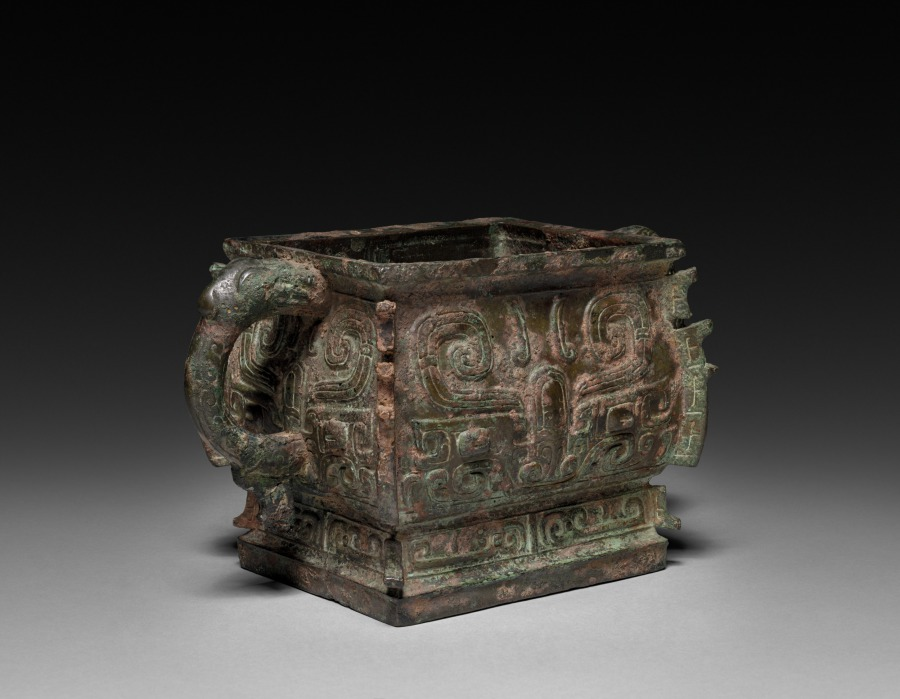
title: Kuei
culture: China, Western Zhou dynasty (c. 1046–771 BCE)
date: 1045–771 BCE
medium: bronze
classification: Metalwork